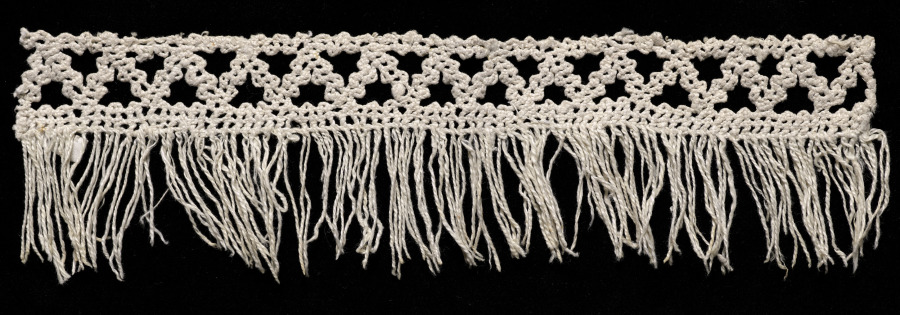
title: Lace Insertion with Fringe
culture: Italy, Venice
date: 1540–60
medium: linen: bobbin lace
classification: Lace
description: Although this fringed bobbin lace fragment is made of linen, its format is like those for laces made of gold, silver, and colored silk threads.